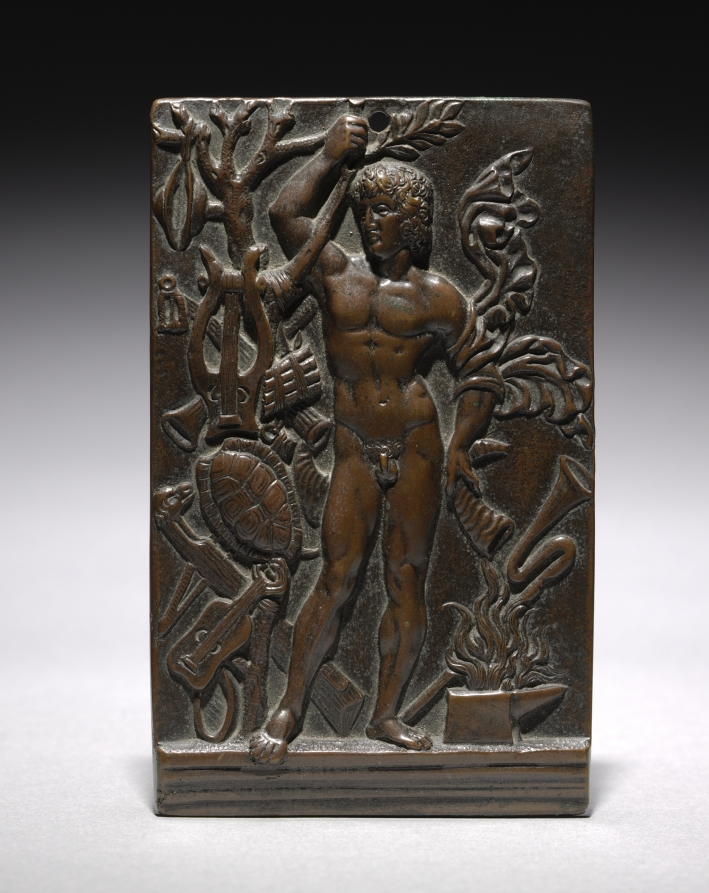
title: Allegory of Music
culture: Northern Italy, 16th century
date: c. 1500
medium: bronze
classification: Sculpture